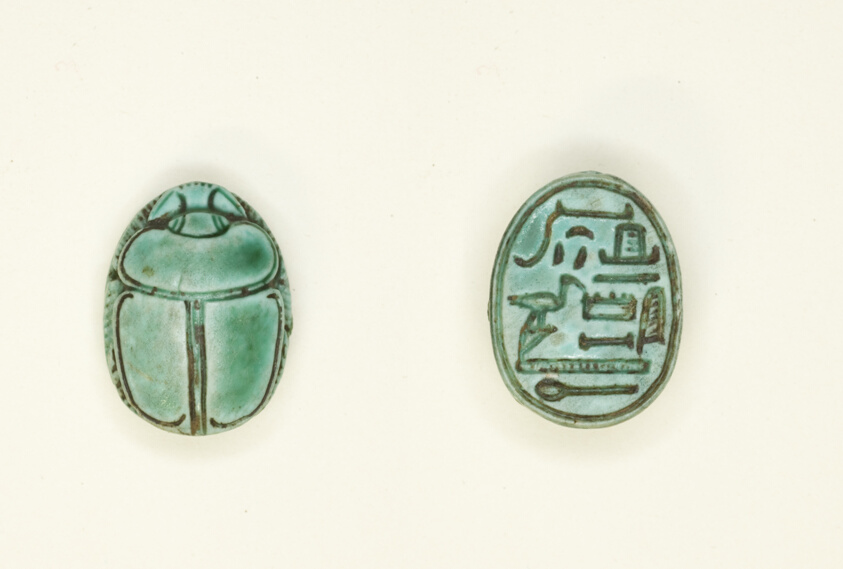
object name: Costume and Accessories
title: Scarab: Title (Overseer of the Granary) and Name (Djehuty)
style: egyptian, ancient, new kingdom, second intermediate period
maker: Egyptian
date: Second Intermediate Period–New Kingdom, Dynasties 17–18 (about 1580–1525 BCE)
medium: Glazed steatite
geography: Egypt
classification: scarab; ancient art; costume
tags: scarab beetle, Hieroglyphs, inscription, insects